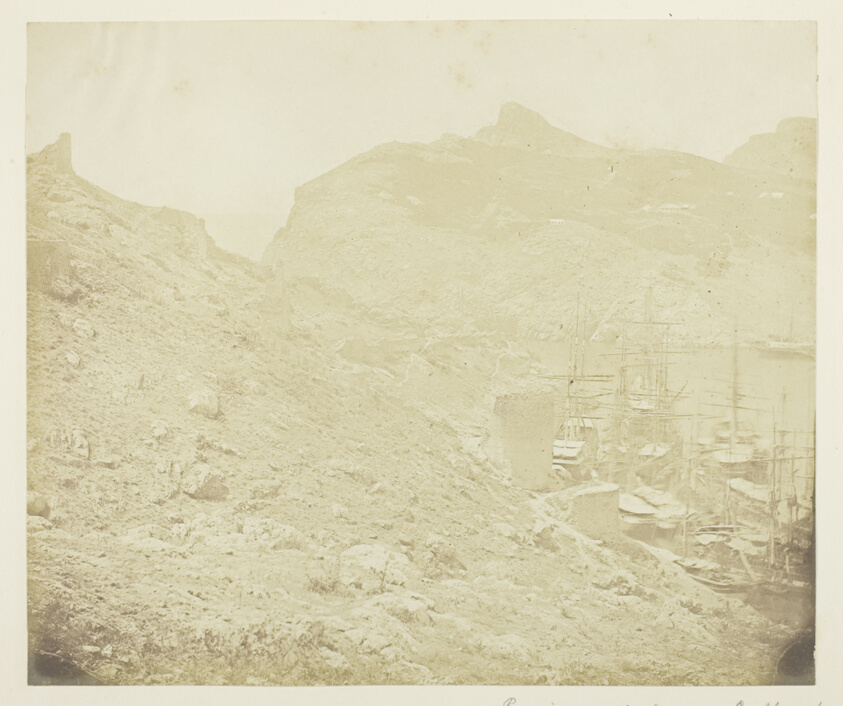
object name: Photograph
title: Remains of Old Genoese Castle above the Harbour of Balaklava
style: 19th century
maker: James Robertson (Scottish, c. 1813–d. after 1881)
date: 1855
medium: Albumen print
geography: Scotland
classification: unidentified; photography; photograph